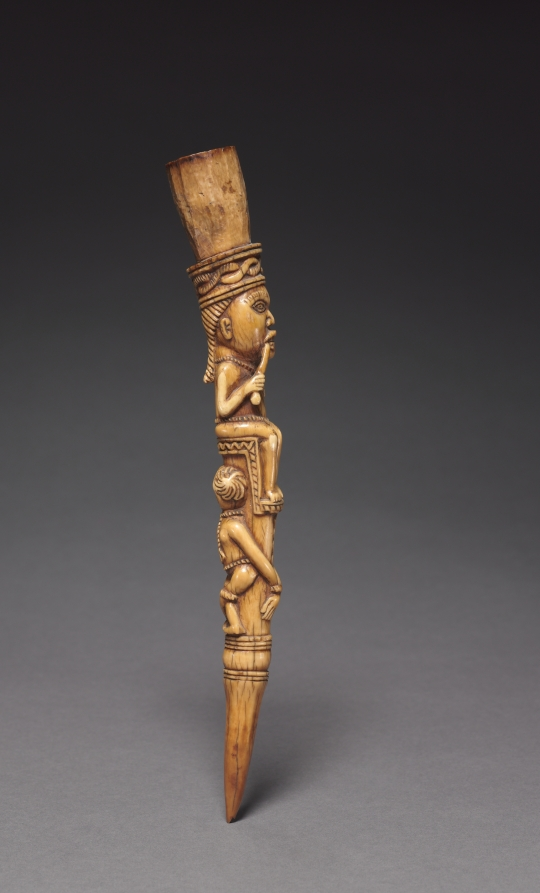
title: Scepter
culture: Africa, Central Africa, Democratic Republic of Congo (most likely), Cabinda, or Republic of Congo, probably Kongo-style (Yombe sub-group) carver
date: late 1800s–early 1900s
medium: ivory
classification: Implements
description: Used by male chiefs, ivory scepters were symbols of status indicating worldly authority and supernatural influence. The use of ivory implies that the chief has the fatal power of an elephant. The figurine shows a chief enthroned on the bound body of a criminal destined for such a death. A medicine package would have been enclosed within the container extending from the figure’s head, bestowing supernatural powers.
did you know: Scepters often represent the chief sitting atop a bound prisoner or attribute to a violent death.